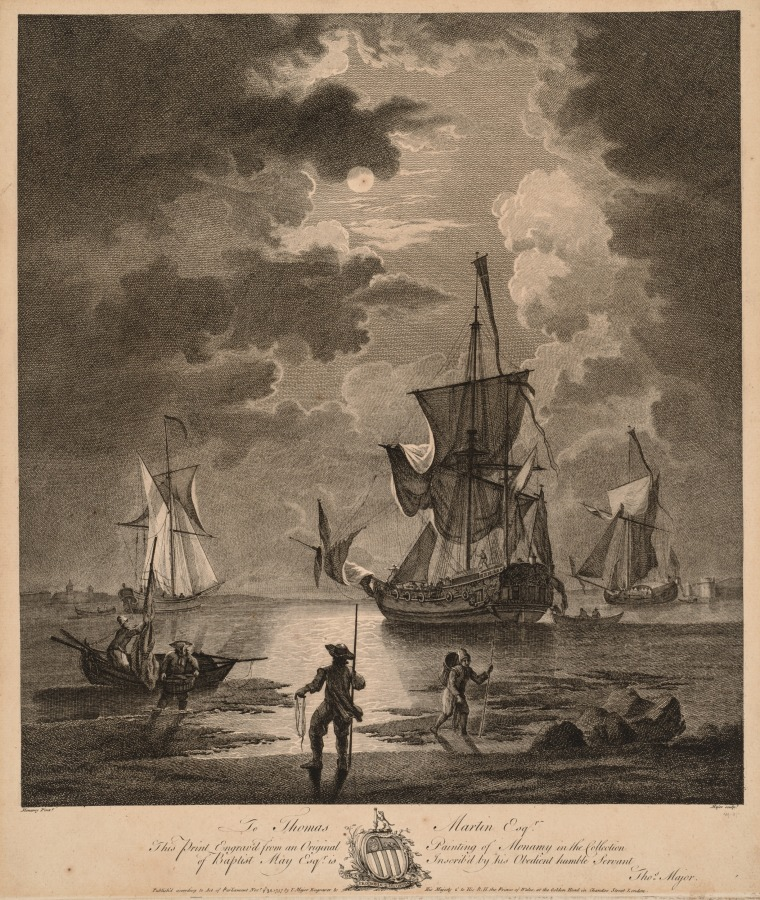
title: A View of the Sea by Moonlight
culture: England, 18th century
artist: Thomas Major (British, 1714–1799)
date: 1757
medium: engraving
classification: Print